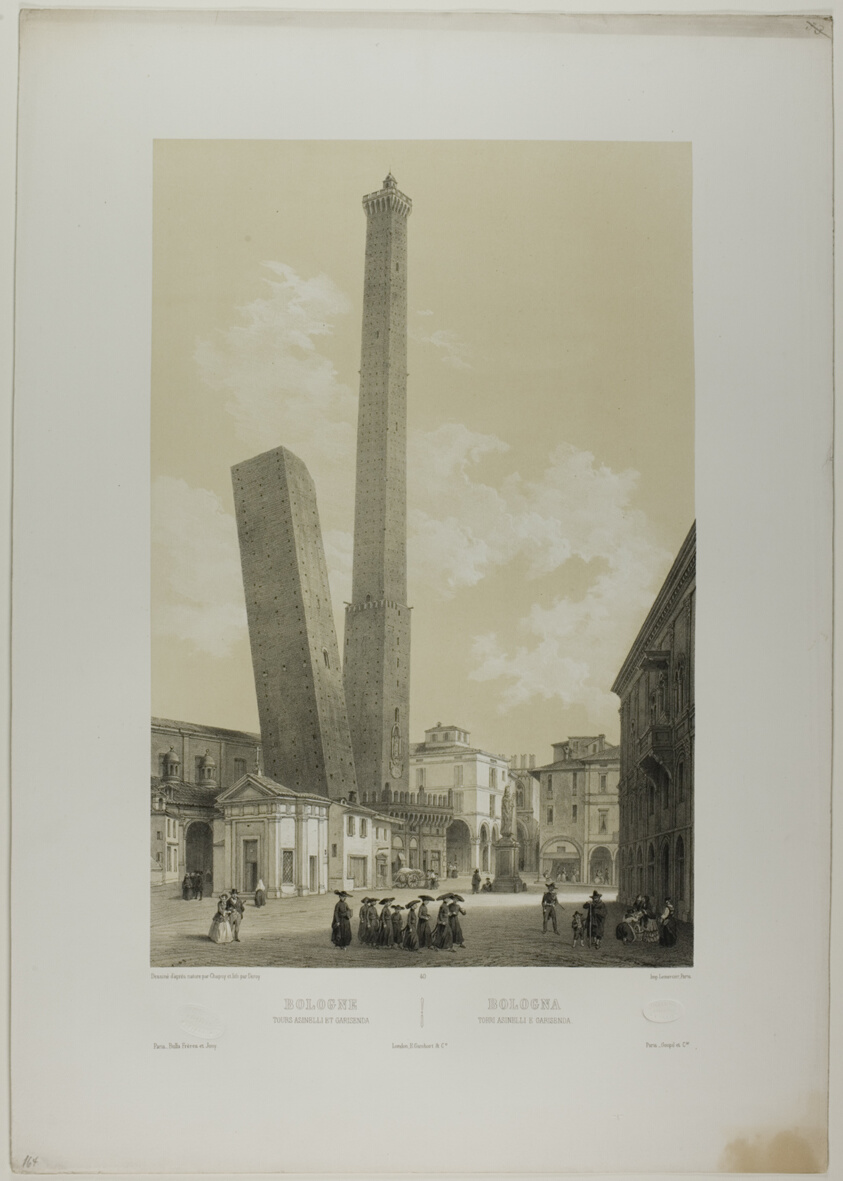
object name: Print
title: Bologna: The Asinelli and Garisenda towers, plate 40 from Italie Monumentale et Pittoresque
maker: Nicolas Chapuy (French, 1790-1858); printed by Deroy (French, 19th century)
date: c. 1848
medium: Lithograph from two stones on white wove paper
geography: France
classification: lithograph; print; prints and drawing